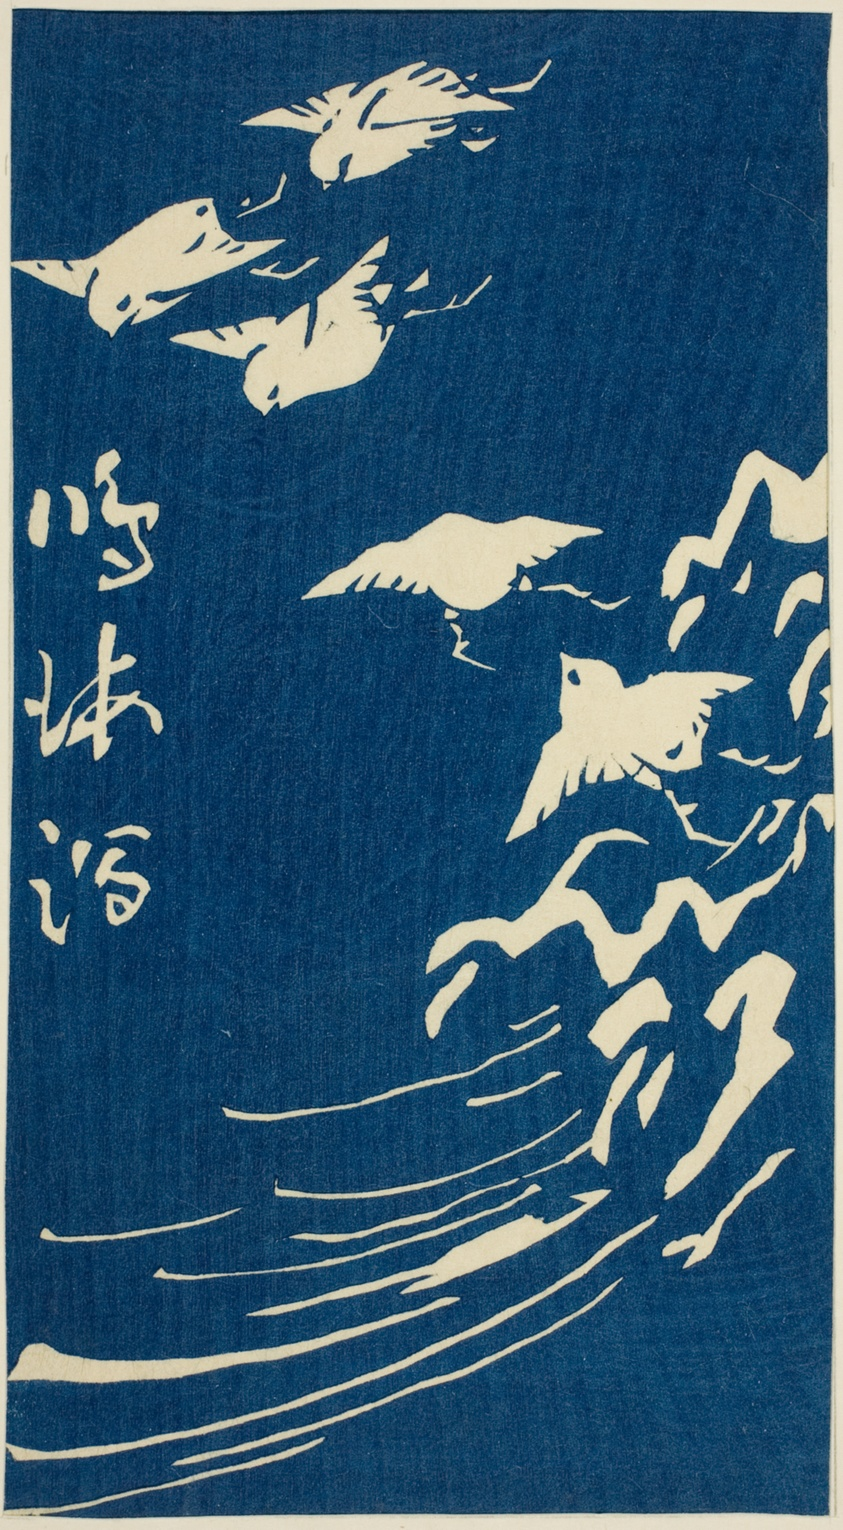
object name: Print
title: Narumi, section of sheet no. 10 from the series "Cutouts of the Fifty-three Stations (Gojusan tsugi harimaze)"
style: Japanese (culture or style)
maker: Utagawa Hiroshige 歌川 広重; Japanese, 1797-1858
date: 1852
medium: Color woodblock print; section of harimaze sheet (uncut sheet: 1939.1296)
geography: Japan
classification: woodblock print; print; asian art